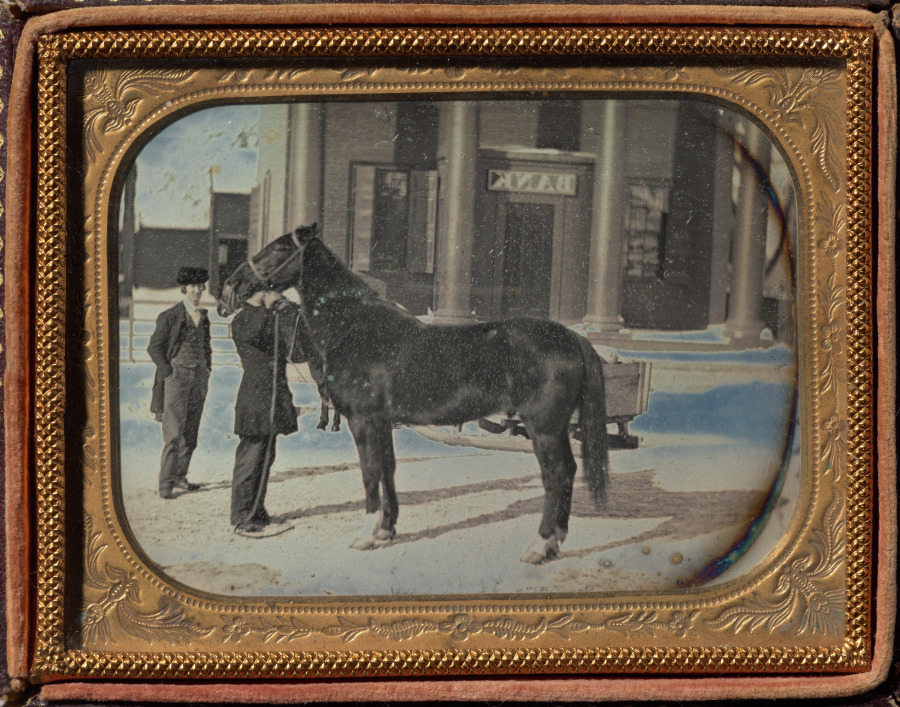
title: Prize Horse in winter, Chemung County, New York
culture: America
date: c. 1852–56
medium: daguerreotype, quarter plate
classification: Photograph